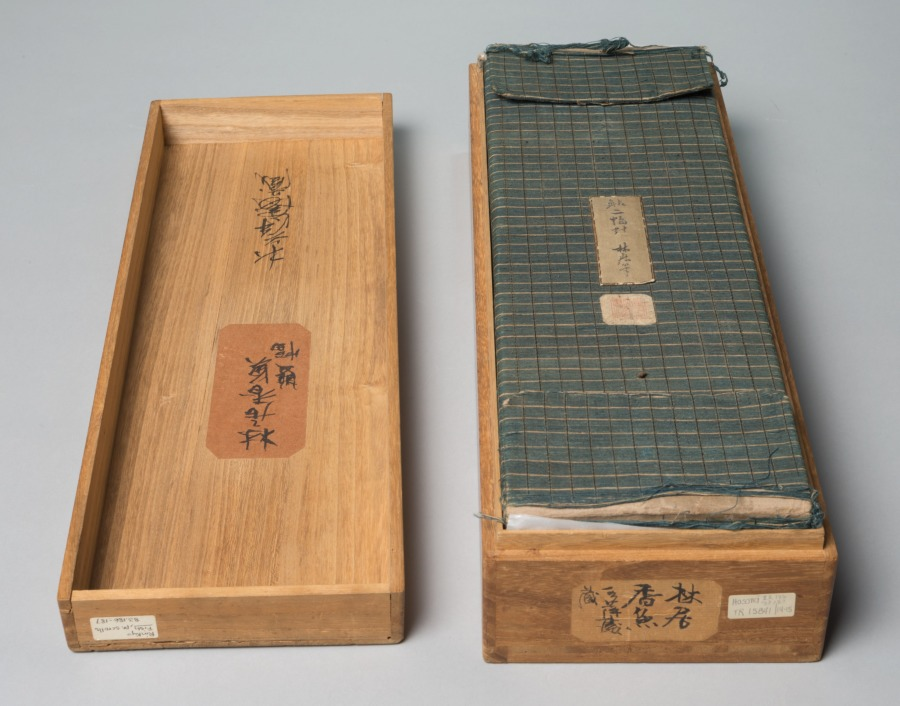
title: Fish and Rock; Fish and Seaweed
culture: Japan, Momoyama period (1573–1615)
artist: Rinkyo (Japanese)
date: 1573–1615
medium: pair of hanging scrolls; ink on paper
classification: Painting